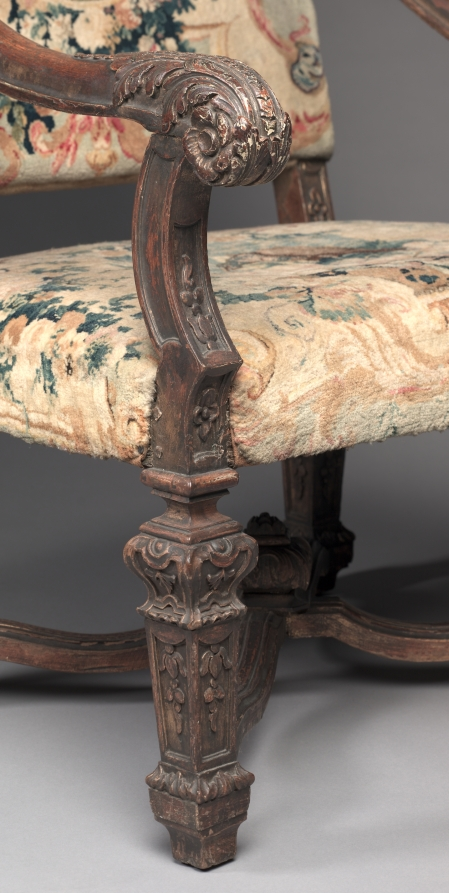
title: Armchair (1 of 4)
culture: France, 18th century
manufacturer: Royal Savonnerie Manufactory, Chaillot Workshops (French, est. 1627)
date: before 1717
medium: carved wood, Savonnerie knotted-pile (symmetrical rug knot) upholstery; wool, hemp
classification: Furniture and woodwork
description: These chairs belong to a suite that includes a settee (also in the CMA’s collection) and a tapestry made for a count and countess to mark their wedding in 1717. Furniture of this scale was usually placed against the wall in grand reception halls, more as a display of wealth than for use. Upholstered in Savonnerie tapestries, this suite was among the most treasured and expensive example anyone could own and typically reserved for royalty. To add decorative and intellectual interest to the textiles, weavers incorporated symbols depicting various stories from the Fables of Jean de La Fontaine, published from 1668 to 1694 and largely adapted from Aesop and other early storytellers.